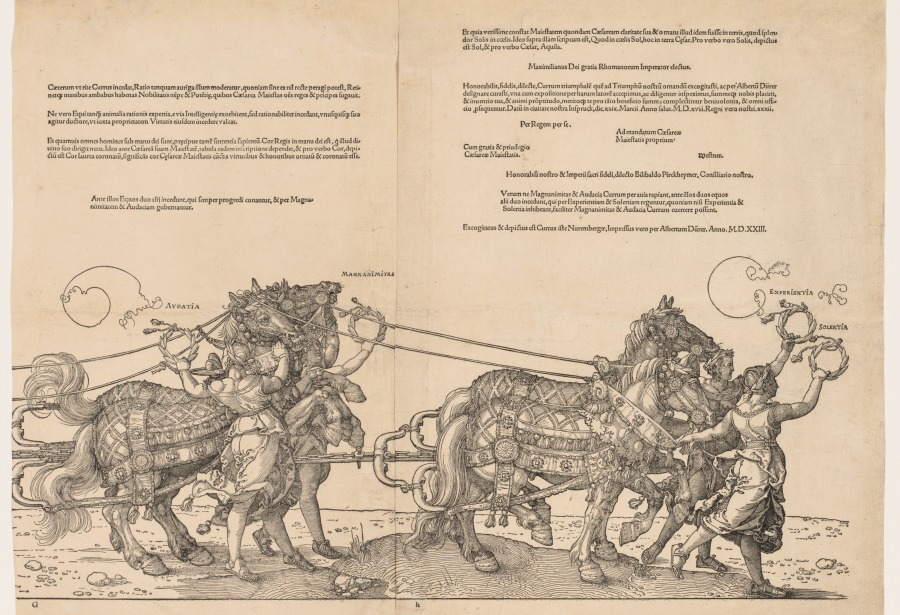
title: The Great Triumphal Car of Emperor Maximilian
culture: Germany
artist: Albrecht Dürer (German, 1471–1528)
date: 1523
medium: woodcut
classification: Print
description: Dürer conceived this fantastical chariot as part of a larger commission to depict Holy Roman Emperor Maximilian I (reigned 1486–1519) in a triumphal procession. The ruler sits enthroned in the lavish car, as Victory holds a laurel wreath above his imperial crown. Her feathered wings list Maximilian’s military campaigns. Nearly every component of the allegorical pageant—from the entourage of female attendants to the laurel garlands—has a Latin label describing honorable qualities of an ideal prince. The car rolls on wheels of Magnificence, Honor, Dignity, and Glory. Its driver is Reason, who guides a team of 12 horses with reins of Nobility and Power. Virtues of Justice, Strength, Wisdom, and Temperance, stand on pedestals arranged around the emperor. Maximilian died in 1519, before the ambitious commission could be completed. Dürer published The Great Triumphal Car at his own expense with text composed by his friend Willibald Pirckheimer (1470–1530).